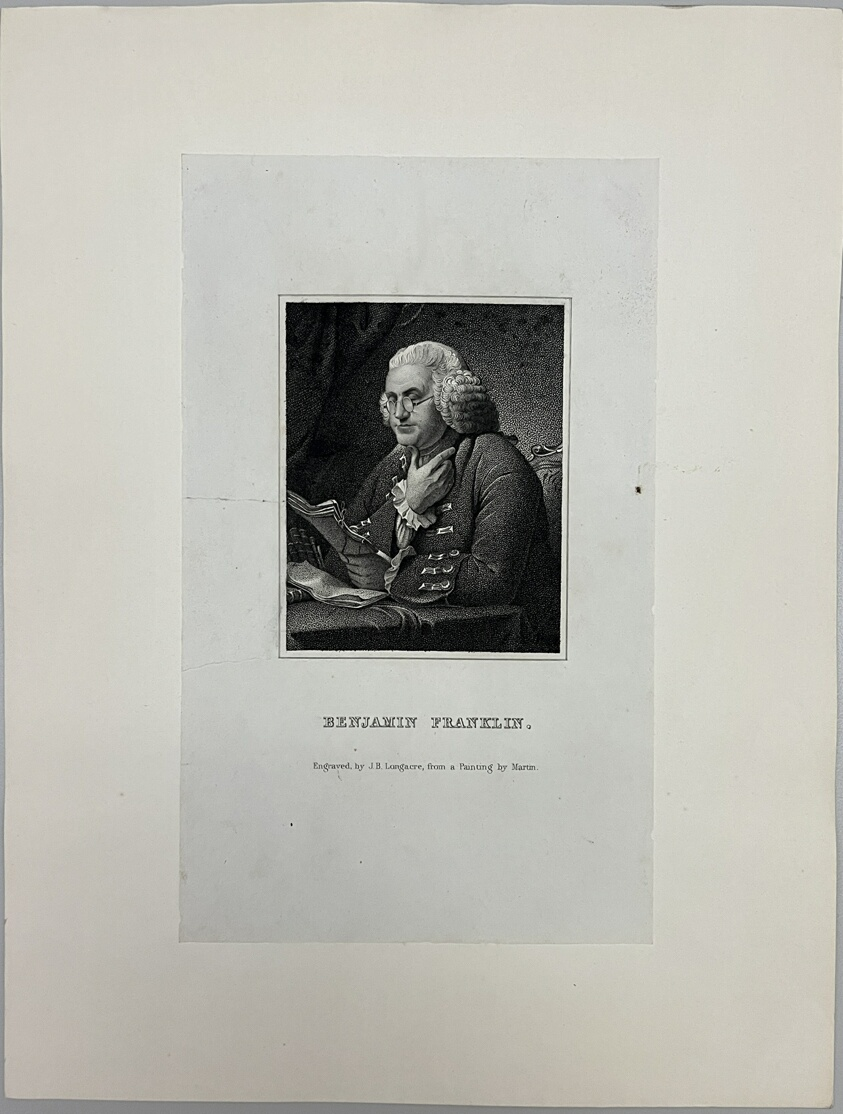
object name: Print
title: Benjamin Franklin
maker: James Barton Longacre (American, 1794-1869); after Martin (likely American, 19th century)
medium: Stipple engraving on paper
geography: United States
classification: reproduction; print; prints and drawing